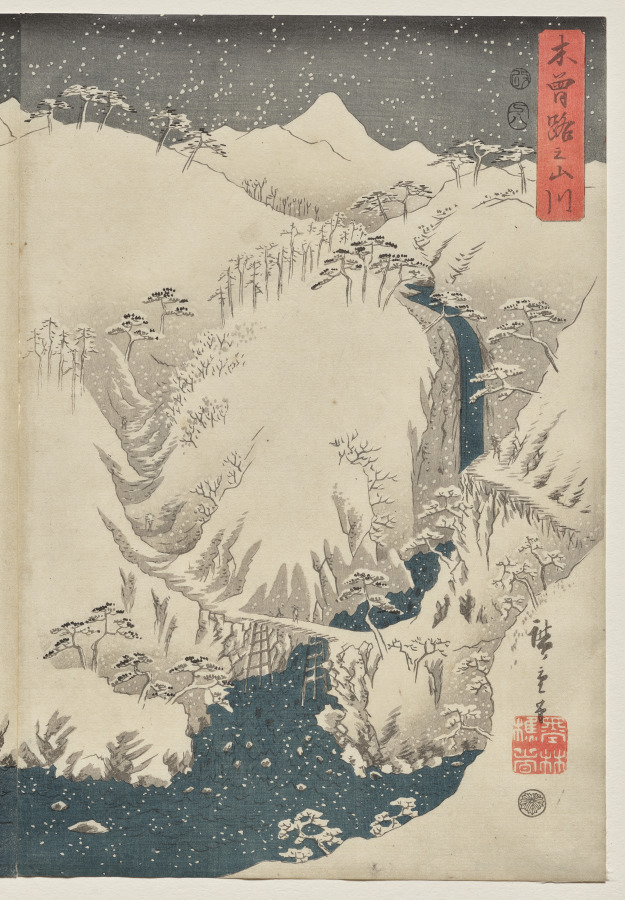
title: Mountain and River on the Kiso Road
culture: Japan, Edo period (1615–1868)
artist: Utagawa Hiroshige (Japanese, 1797–1858)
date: 1857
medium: One of a triptych of color woodblock prints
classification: Print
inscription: Signature: Hiroshige hitsu Publisher: Okazawaya Taheiji (emblem) Censorship Seal: aratame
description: Late in his career, Hiroshige explored the poetic theme of setsugekka, “snow, moon, and flowers,” in a set of three triptychs. This panoramic scene features a river passing snow-covered mountains along the Kiso Road.